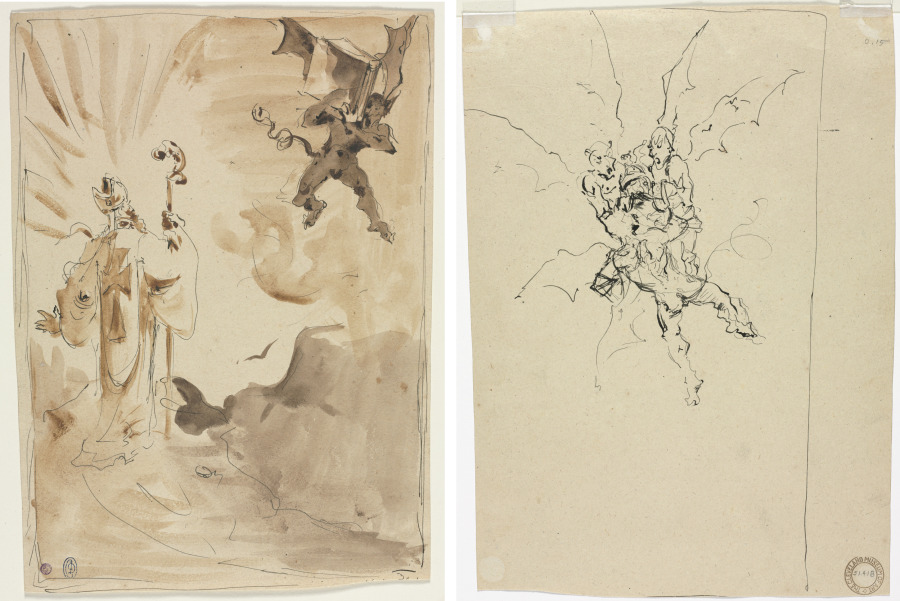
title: The Bishop and the Demon (recto); Three Demons Holding a Knight (verso)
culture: Italy, 20th century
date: 1900s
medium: pen and black ink and brush and brown wash (two different colors brown wash)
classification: Drawing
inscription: verso: upper right, in graphite: 0.15